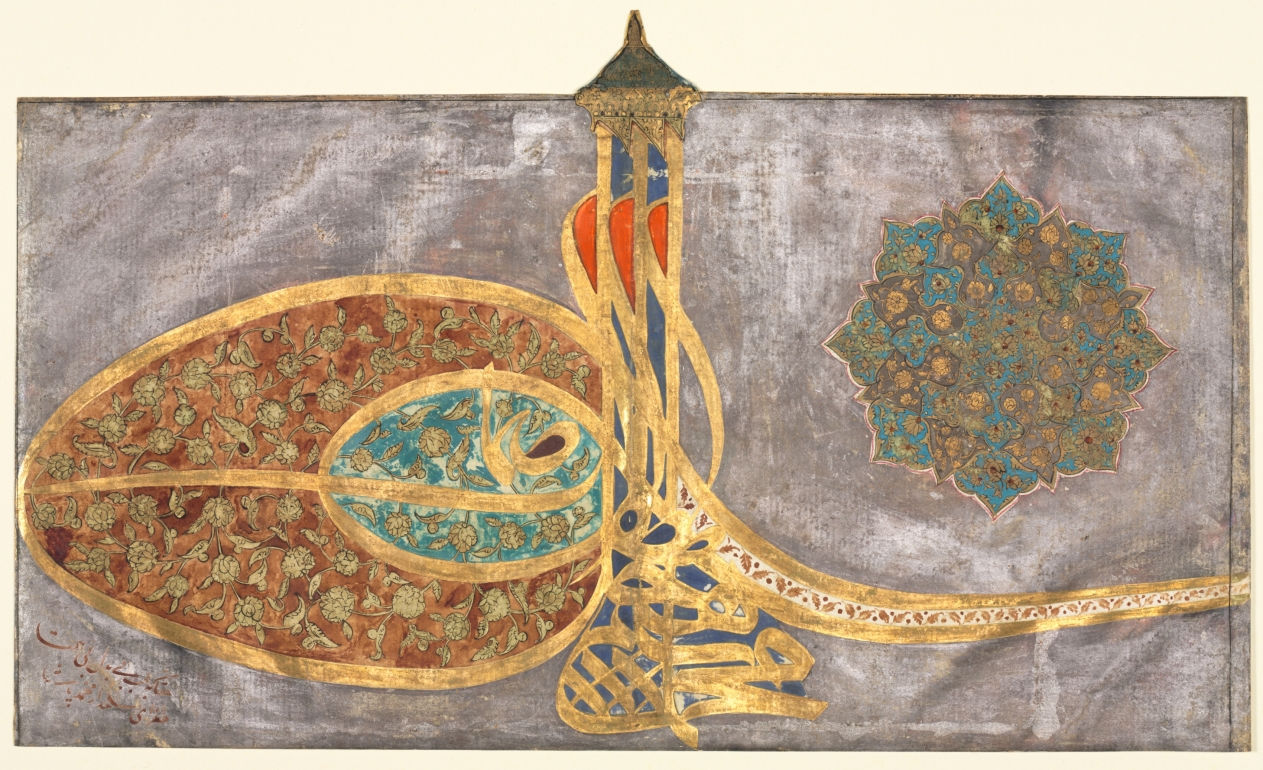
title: Tughra: Shah Muhammad bin Ibrahim Khan, al-muzaffar daima (Sultan Mehmed, son of Ibrahim Khan, the eternally victorious; Calligraphy (Ottoman Turkish Signature), Single Page Manuscript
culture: Turkey, Ottoman period, reign of Sultan Mehmed IV, 1648–87)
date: 1648–87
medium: opaque watercolor, gold, and silver on paper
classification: Manuscript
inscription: Tughra script reads: "Mehmed, son of Ibrahim Khan, the eternally victorious"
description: A tughra is a formalized ornate signature or monogram at the top of a royal edict. This tughra has been cut off from the vertical scroll on which a proclamation of the Ottoman Sultan Mehmed IV was written. Mehmed IV ruled during a time when the empire began to decline in power due to internal rivalries and the catastrophic military defeat at the Battle of Vienna in 1683. In bold gold lettering, “Mehmed, son of Ibrahim Khan, the Eternally Victorious” has been calligraphed in Turkish. These words form the structure of the design, which has been filled with colors, floral patterns, and topped with an architectural crown. A foliated sunburst in turquoise, gold, and silver augments the luxury of the monogram.